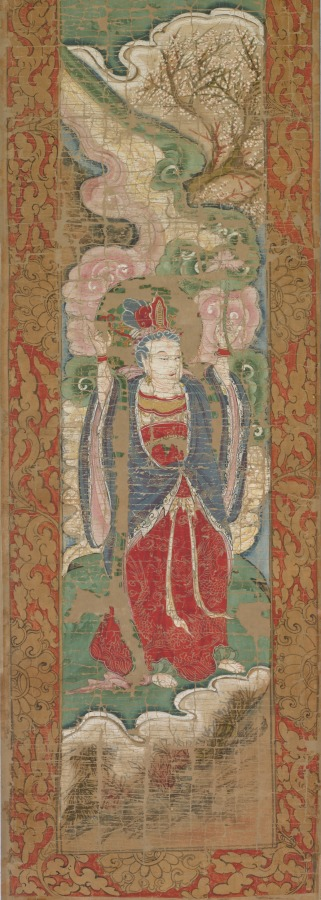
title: Buddhist Panel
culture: China or Korea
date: 1600s–1700s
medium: Hanging scroll; ink and color on paper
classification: Painting